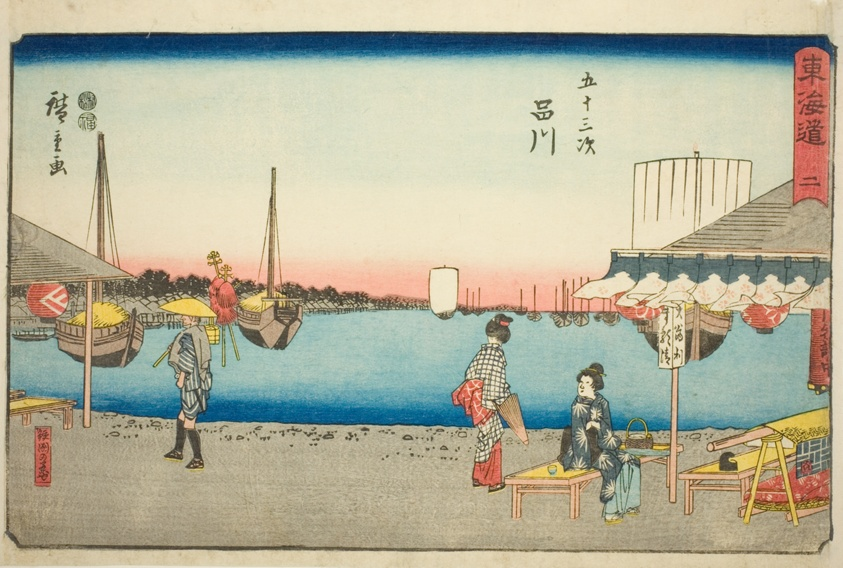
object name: Print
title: Shinagawa: Teahouses at Samegafuchi (Shinagawa, Samegafuchi no chaya)—No. 2, from the series "Fifty-three Stations of the Tokaido (Tokaido gojusan tsugi)," also known as the Reisho Tokaido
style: Japanese (culture or style)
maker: Utagawa Hiroshige 歌川 広重; Japanese, 1797-1858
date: c. 1847/52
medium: Color woodblock print; oban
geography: Japan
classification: woodblock print; print; asian art